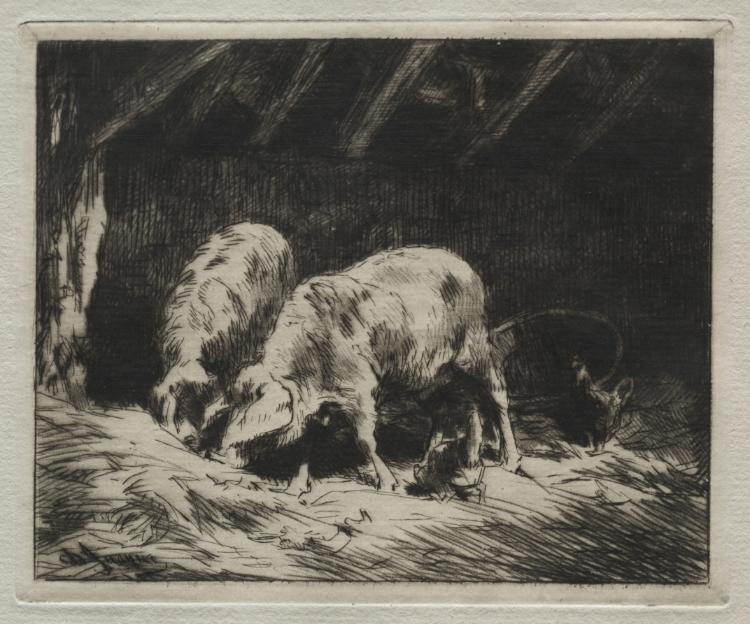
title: Two Pigs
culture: France, 19th century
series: Suite of Six Etchings and Drypoints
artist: Charles-Émile Jacque (French, 1813–1894)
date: 1884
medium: drypoint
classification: Print